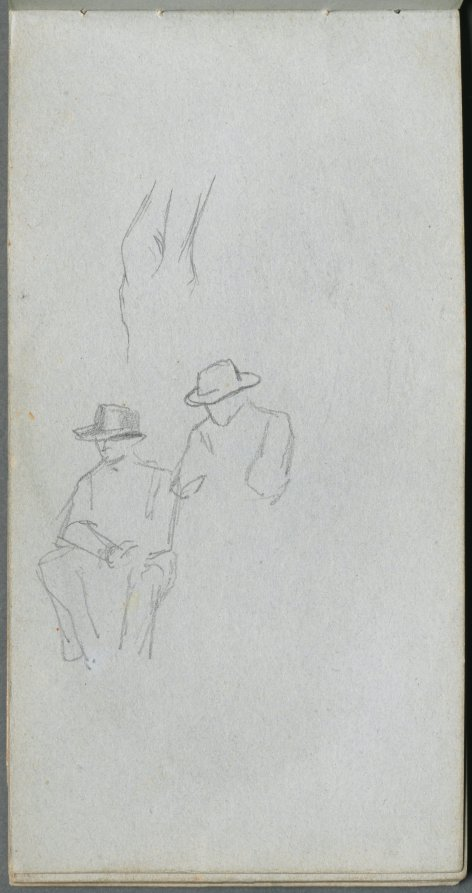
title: Sketchbook, page 32: Study of Figures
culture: France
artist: Ernest Meissonier (French, 1815–1891)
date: c. 1860s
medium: graphite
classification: Bound Volume